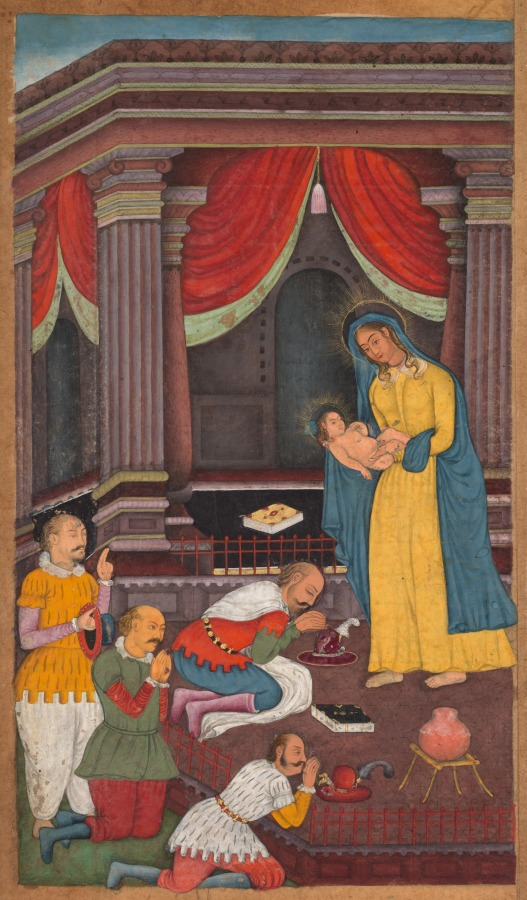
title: The Adoration of the Shepherds, from a Mirror of Holiness (Mir’at al-quds) of Father Jerome Xavier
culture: Mughal India, Allahabad, made for Prince Salim (1569–1627)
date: 1602–4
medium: Gum tempera, ink, and gold on paper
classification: Manuscript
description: Without reading the text, it would be difficult to identify the adorers as shepherds, because they are clothed as Portuguese merchants with ruffed collars and broad-brimmed hats. Mary stands with her divine newborn in a fenced enclosure, evocative of a sacred or royal space within a rather palatial setting, complete with pseudo-Ionic columns and heavy red draperies. The two books on the floor indicated to the Mughals that Christians, like Muslims, revere a definitive sacred scripture such as the Bible or the Koran.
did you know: The finishing details on this painting, such as two of the shepherds’ feet, the tile patterning, and probably arabesques, have not been completed.